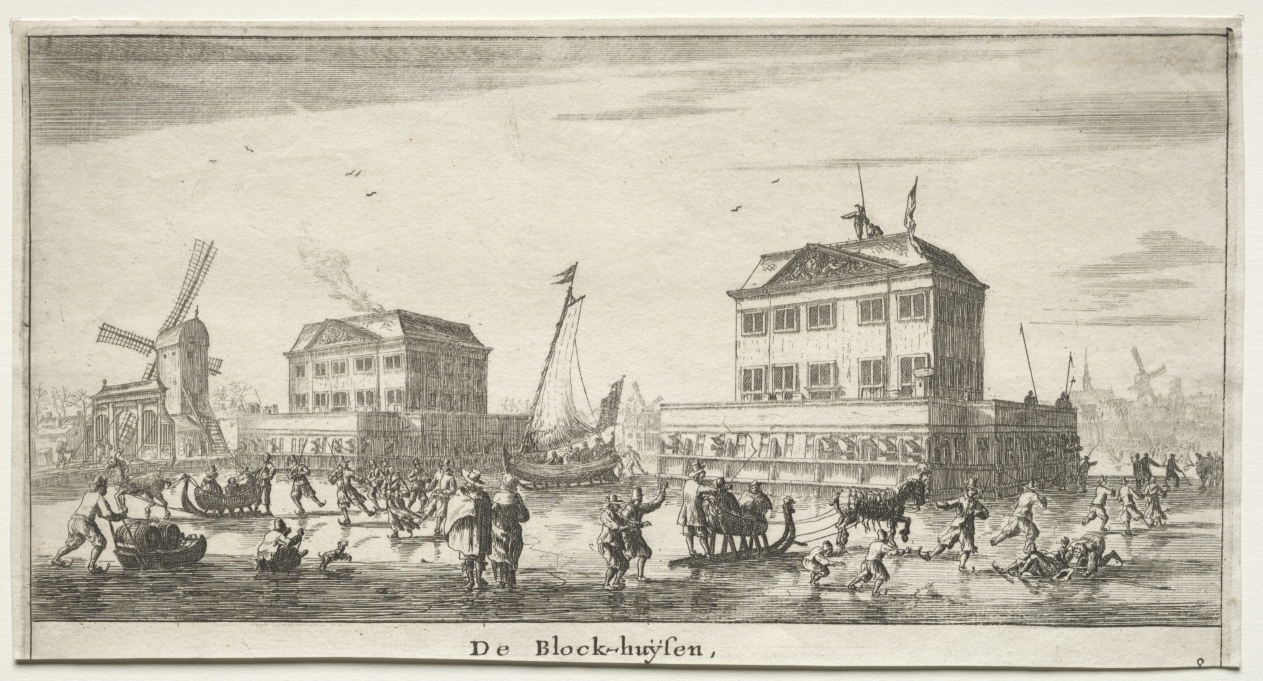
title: Various Ships and Views of Amsterdam (Verscheÿde Schepen en Gesichten van Amstelredam), Part III: De Block-huÿsen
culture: Netherlands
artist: Reinier Nooms, called Zeeman (Dutch, c. 1623–1664)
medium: etching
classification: Print